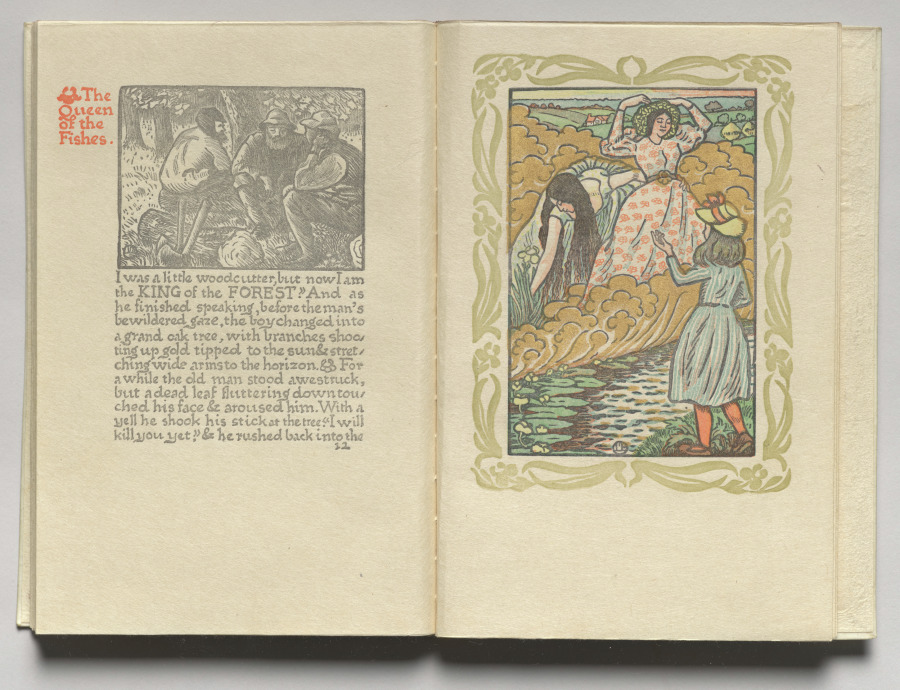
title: The Queen of the Fishes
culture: England, 19th century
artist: Lucien Pissarro (British, 1863–1944)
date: 1894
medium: Bound volume with color wood-engraved illustrations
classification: Bound Volume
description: “The Queen of the Fishes” is a French fairy tale about two mistreated children who turn into a fish and an oak tree. This edition was the first book published by the Eragny Press, the private firm of Lucien Pissarro, son of impressionist painter Camille Pissarro. Following the example of William Morris, Lucien wanted to return to the careful design and high-quality materials of early printed books. He and his wife, Esther Bensusan Pissarro, made this publication almost entirely by hand, including designing and engraving all the illustrations and ornaments.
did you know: Lucian Pissarro was a son of Impressionist painter Camille Pissarro.